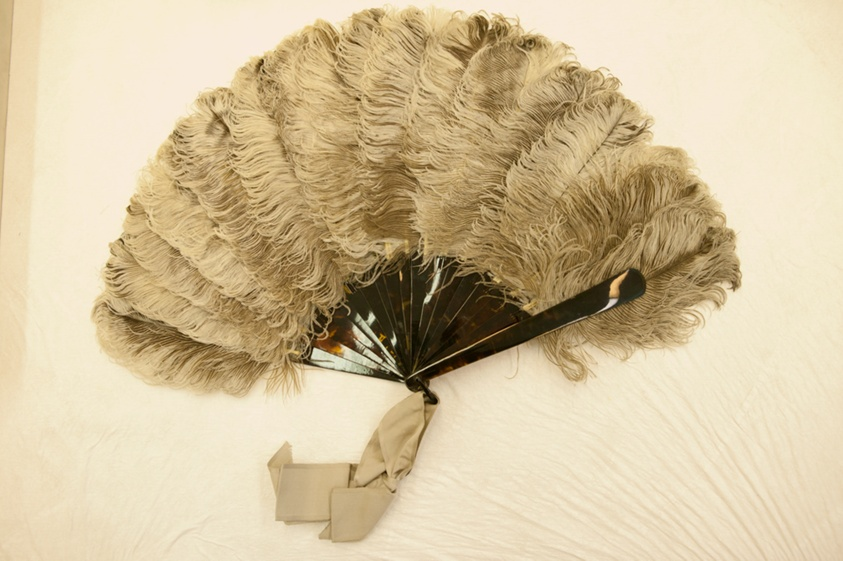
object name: Costume and Accessories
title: Fan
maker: France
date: 1875/1880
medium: Natural ostrich feathers; plain tortoise shell sticks; shell rivet & loop; gray ribbon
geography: France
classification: textile; fan - weaving; costume accessory - folding fan; costume accessory; featherwork; costume